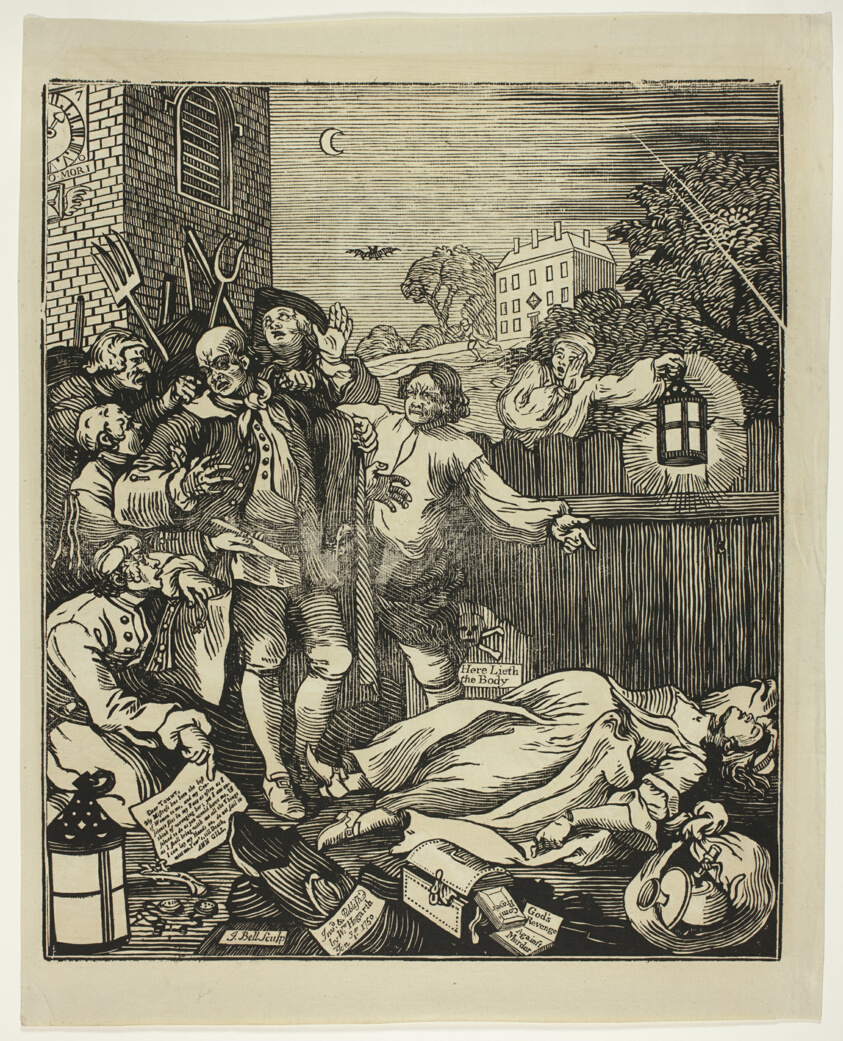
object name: Print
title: Cruelty in Perfection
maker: John Bell (English, 1721–1780); after William Hogarth (English, 1697-1764)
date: 1750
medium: Woodcut with letterpress in black on ivory laid paper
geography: England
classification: woodcut; print; prints and drawing